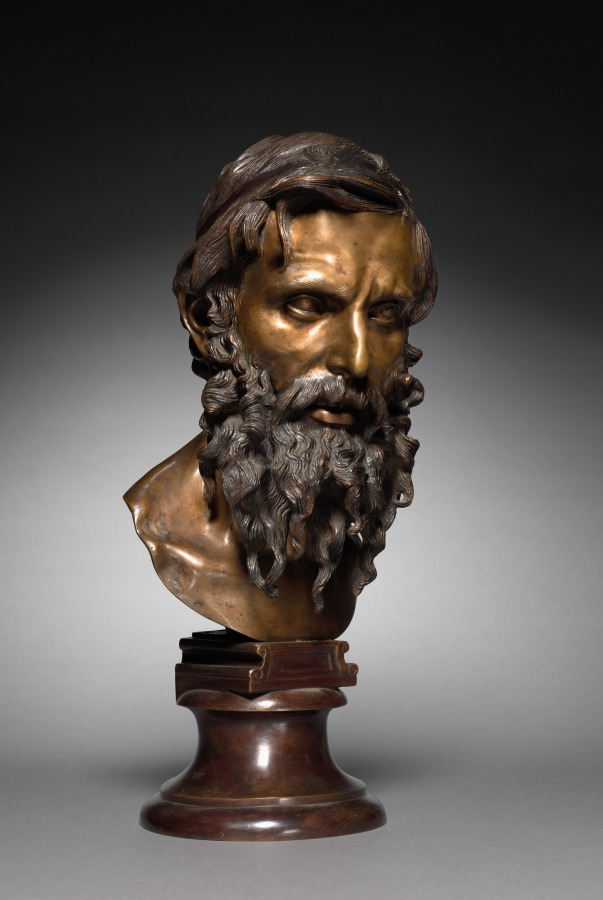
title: Head of a Philosopher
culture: Italy, 19th century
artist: Vincenzo Gemito (Italian, 1852–1929)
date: 1883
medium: bronze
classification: Sculpture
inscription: Signed: "Gemito"; stamped: "FONDERIA GEMITO NAPOLI"